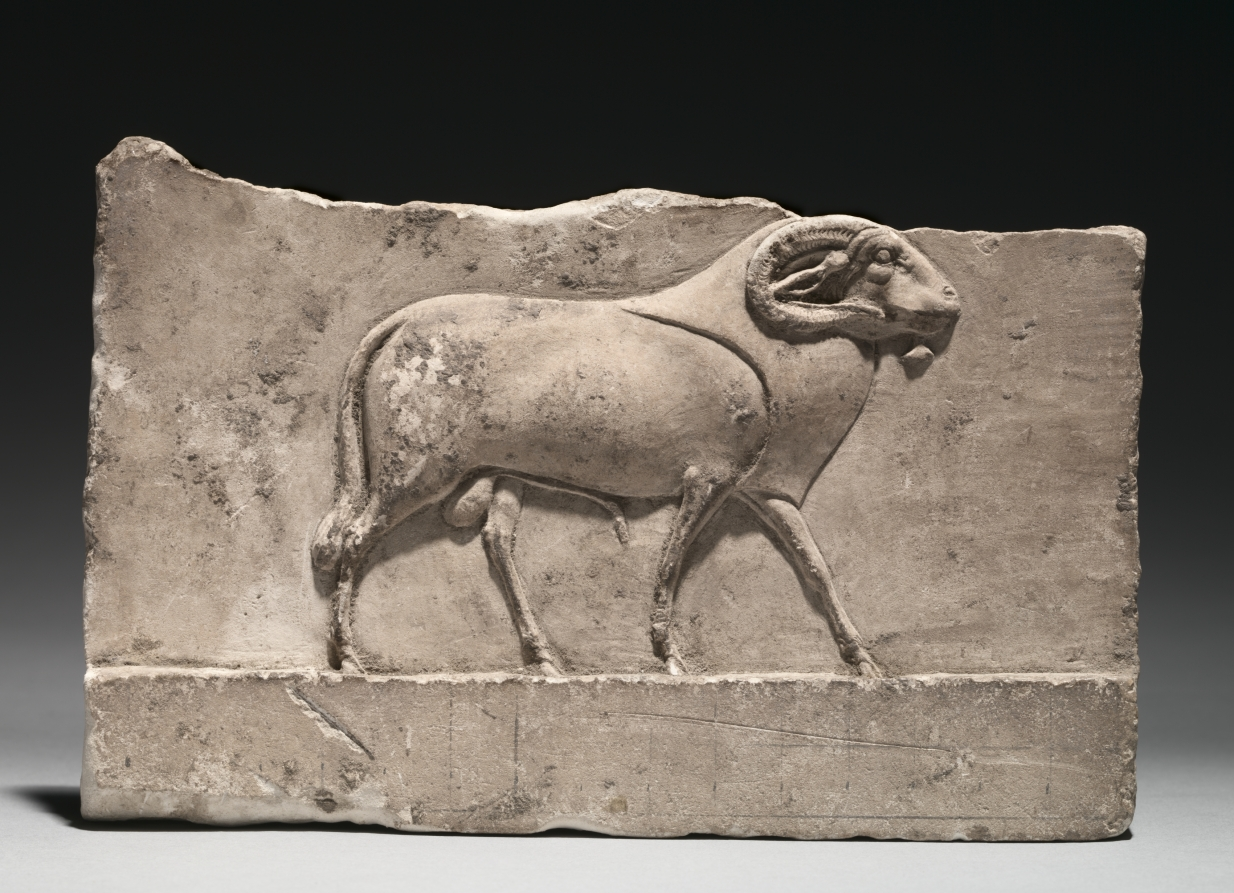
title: Votive Relief of a Ram Deity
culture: Egypt, Greco-Roman period (332 BCE–395 CE), Ptolemaic dynasty (305–30 BCE)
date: 305–30 BCE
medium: limestone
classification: Sculpture